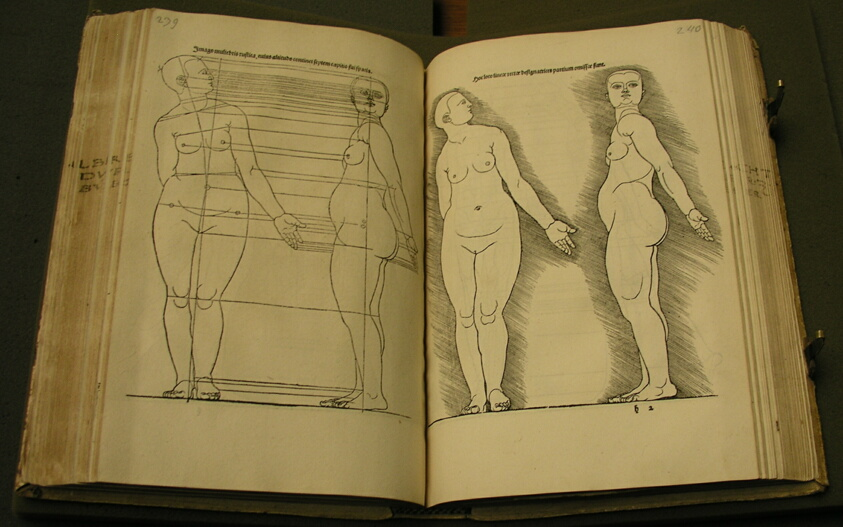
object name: Book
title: Treatise on Fortification and Treatise on Measurement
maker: Albrecht Dürer (German, 1471-1528)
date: 1538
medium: Book with woodcuts and letterpress in black on ivory laid paper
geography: Germany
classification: woodcut; book; prints and drawing